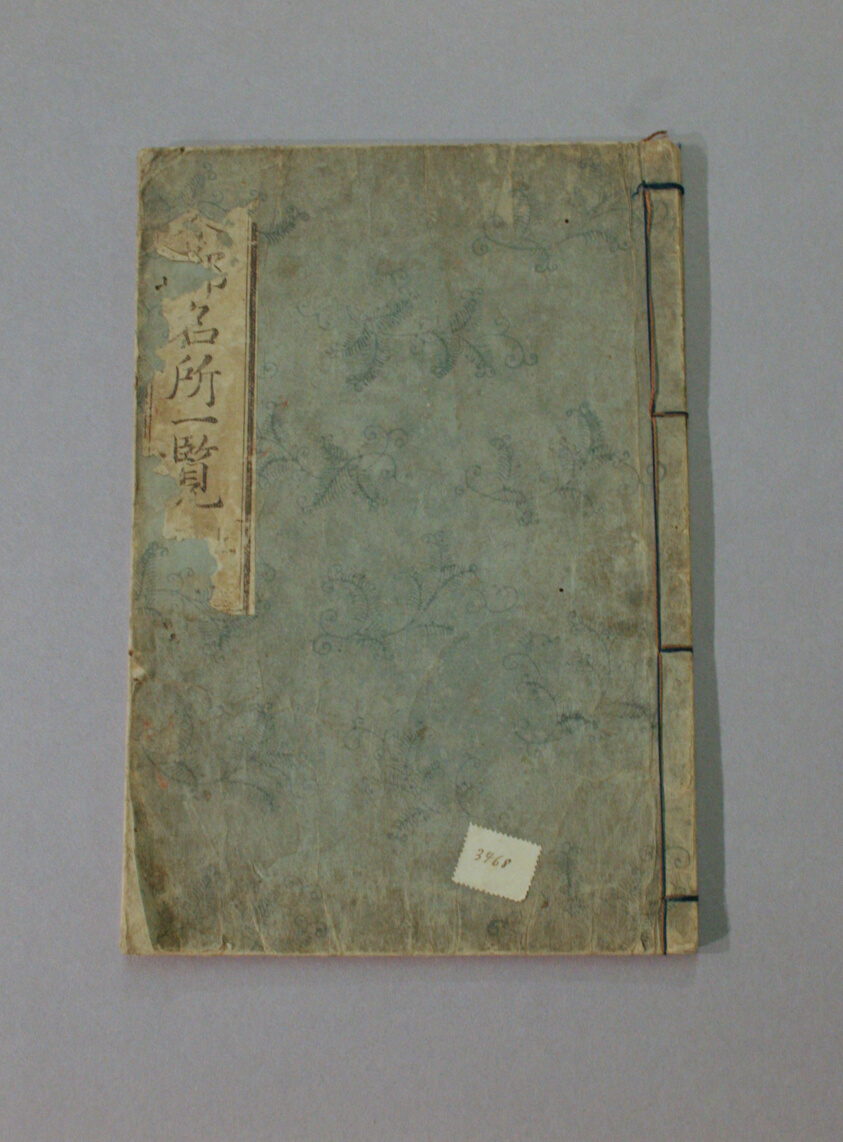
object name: Book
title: Toto Meisho Ichiran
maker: Katsushika Hokusai (Japanese, 1760-1849)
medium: Woodblock printed book, one volume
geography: Japan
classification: book